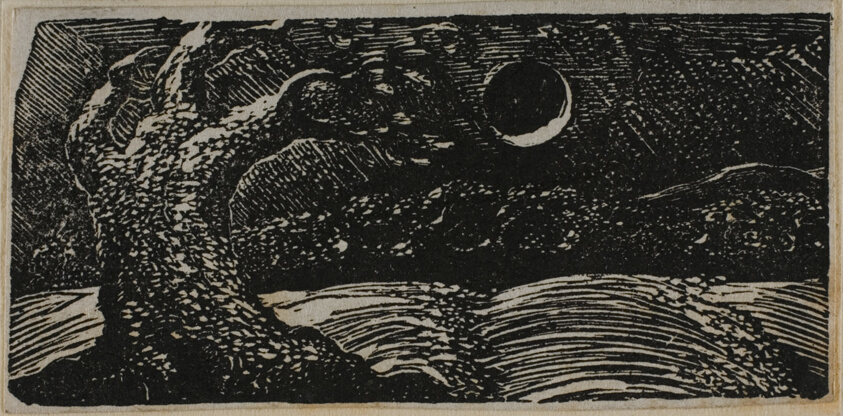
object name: Print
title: Blasted Tree and Flattened Crops, from The Pastorals of Virgil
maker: William Blake (English, 1757-1827)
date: 1821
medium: Wood engraving on off-white wove paper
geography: England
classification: wood engraving; print; prints and drawing; paper